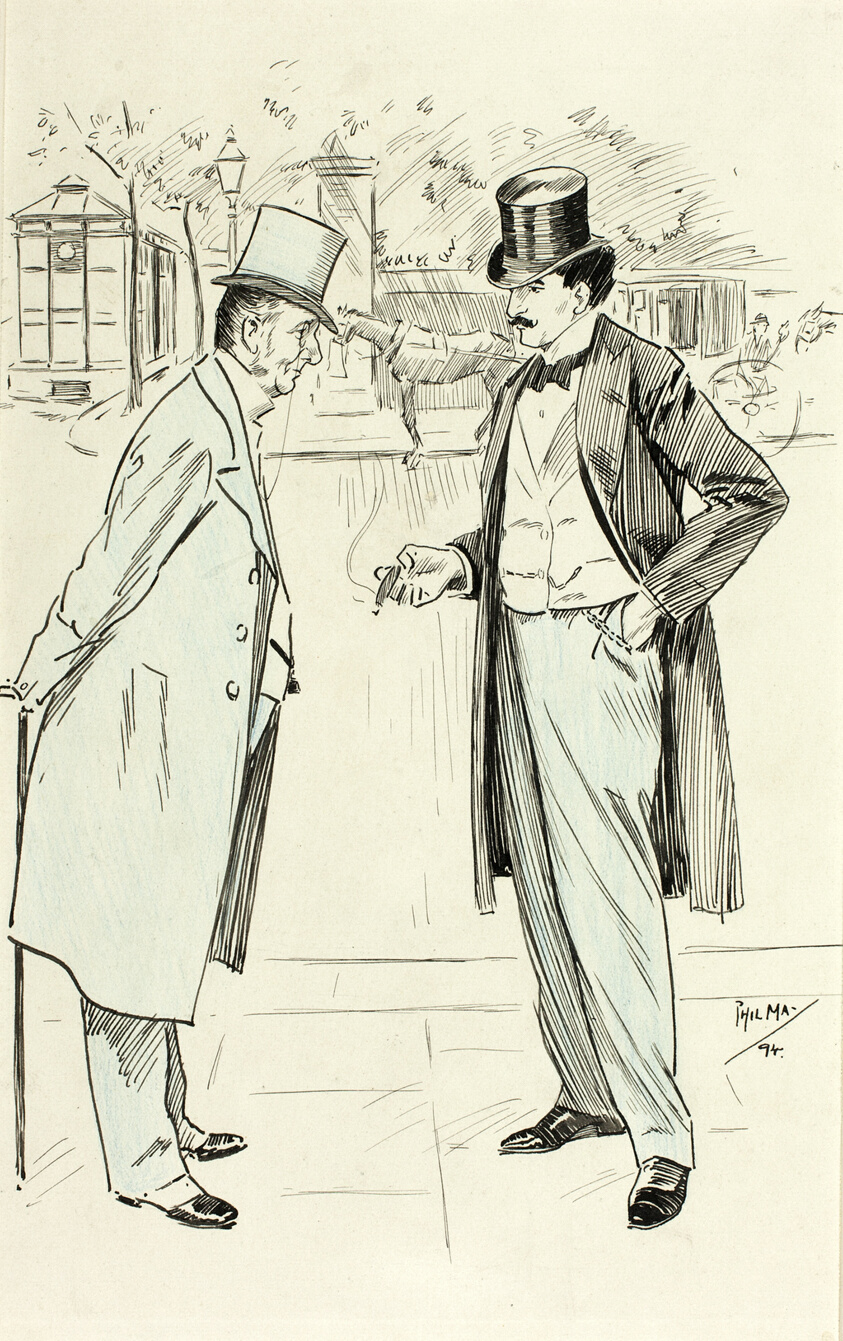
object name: Drawing and Watercolor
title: What Made You Take Up Art as a Profession?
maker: Philipp William May; English, 1864-1903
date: 1894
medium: Pen and black ink with blue pencil on ivory wove paper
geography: England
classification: pen and ink drawings; drawings (visual works); prints and drawing